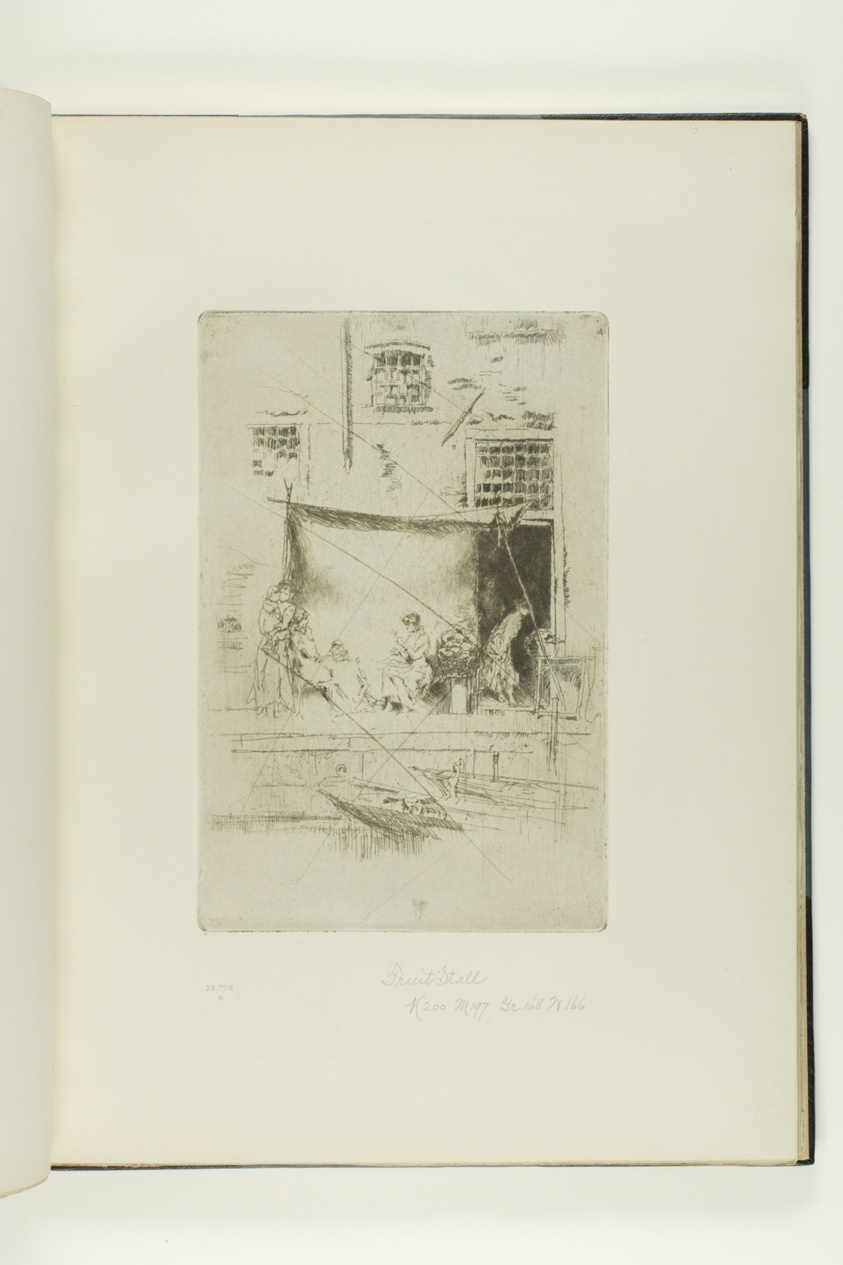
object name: Print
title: Fruit Stall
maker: James McNeill Whistler (American, 1834-1903)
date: 1879–80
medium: Etching and drypoint with foul biting, with drypoint cancellation, in dark brown ink on ivory laid paper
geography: United States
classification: etching; print; prints and drawing; foul biting; drypoint; book; paper